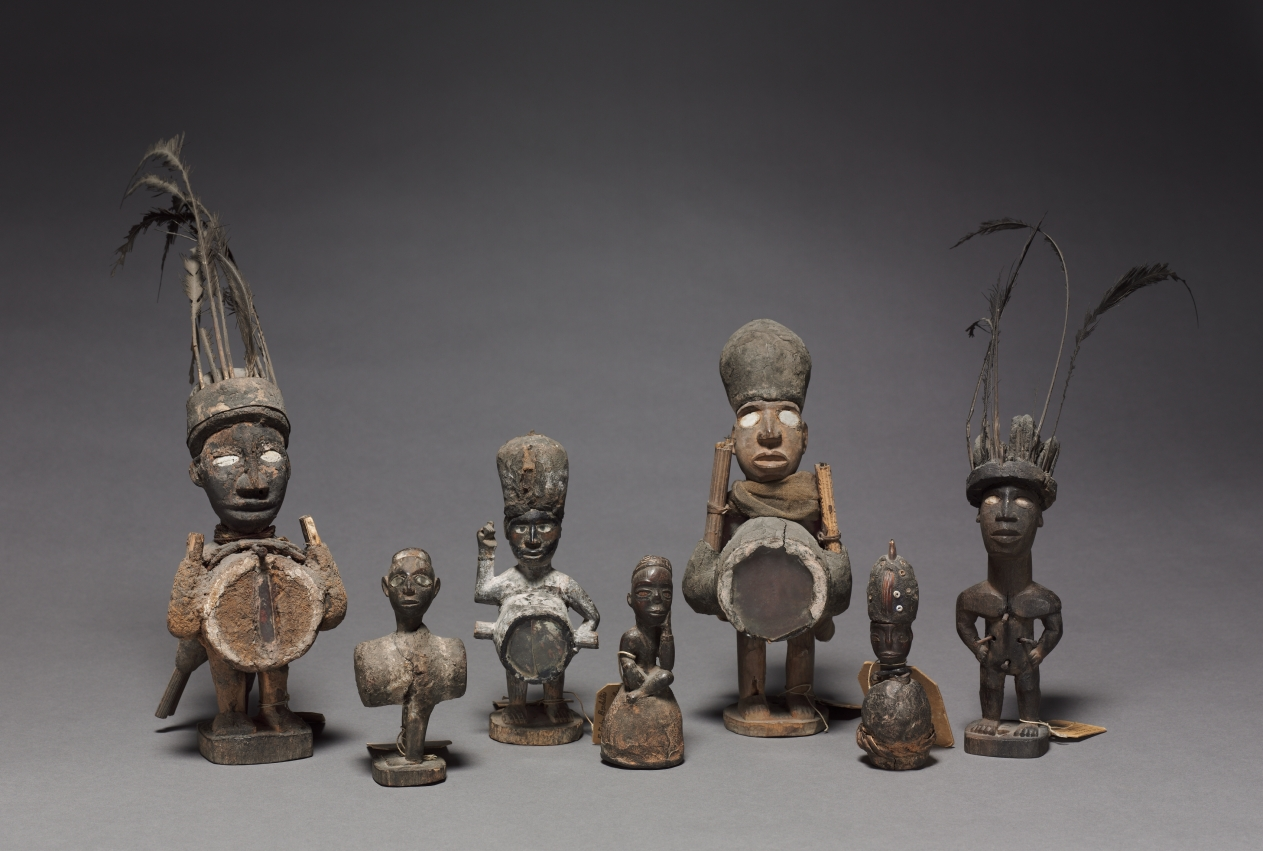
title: Power figure (nkisi)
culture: Africa, Central Africa, Republic of the Congo, Kongo-style maker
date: late 1800s-early 1900s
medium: Wood, organic materials (including resin), and metalized glass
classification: Sculpture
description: One of seven anthropomorphic figurines, these minkisi contained medicines in which an ancestral spirit was believed to reside. The medicines served a metaphorical rather than literal purpose in the resolution of conflicts among Kongo people. This figure contained white- and red-colored medicine loads on its belly and back. Its pose may refer to the nkisi’s capacity to see more than others.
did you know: The nduda minkisi were loaded with gunpowder and/or medicine to protect their owners and to shoot “witches” and other enemies.